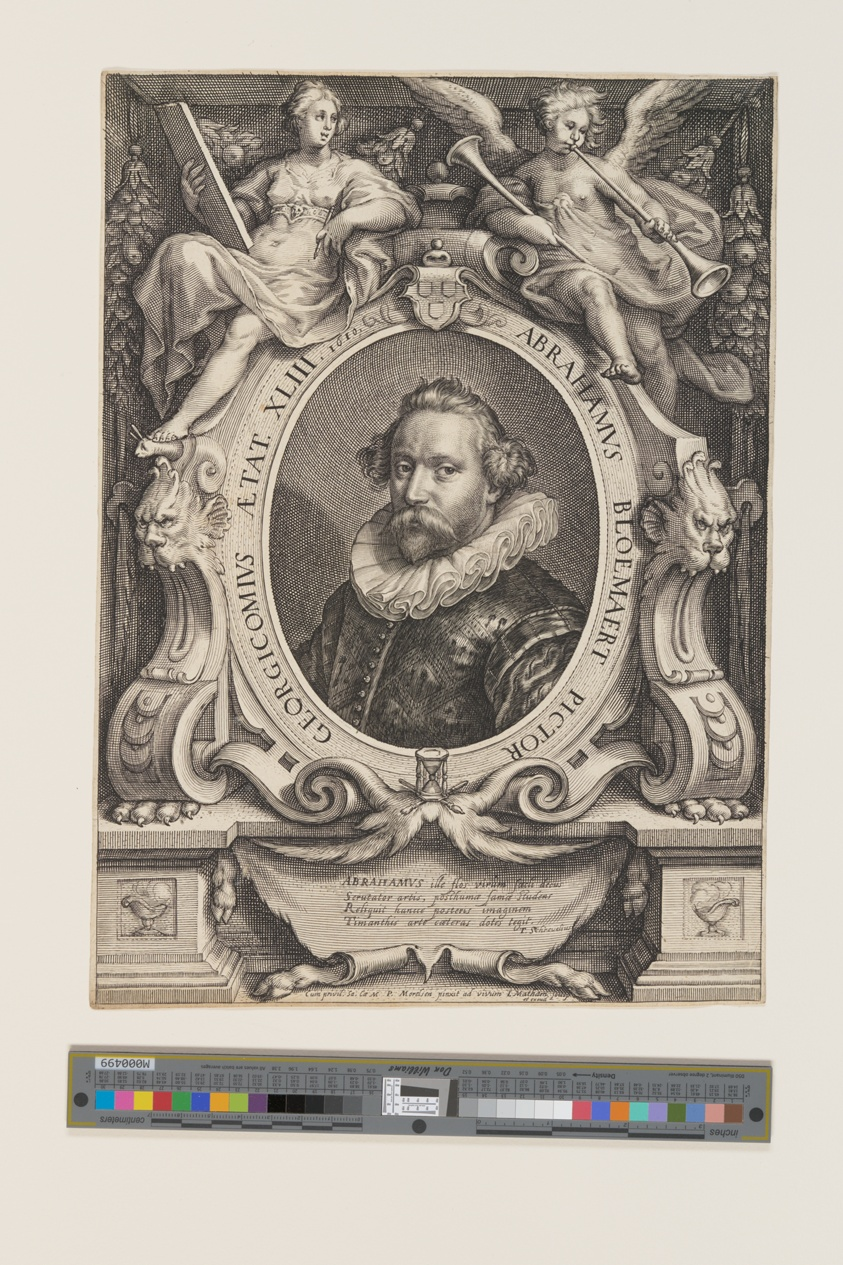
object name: Print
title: Abraham Bloemaert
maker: Jacob Matham (Dutch, 1571–1631); after Paulus Moreelse (Dutch, 1571-1638)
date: 1610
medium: Engraving on ivory laid paper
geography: Netherlands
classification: print; paper; prints and drawing; engraving